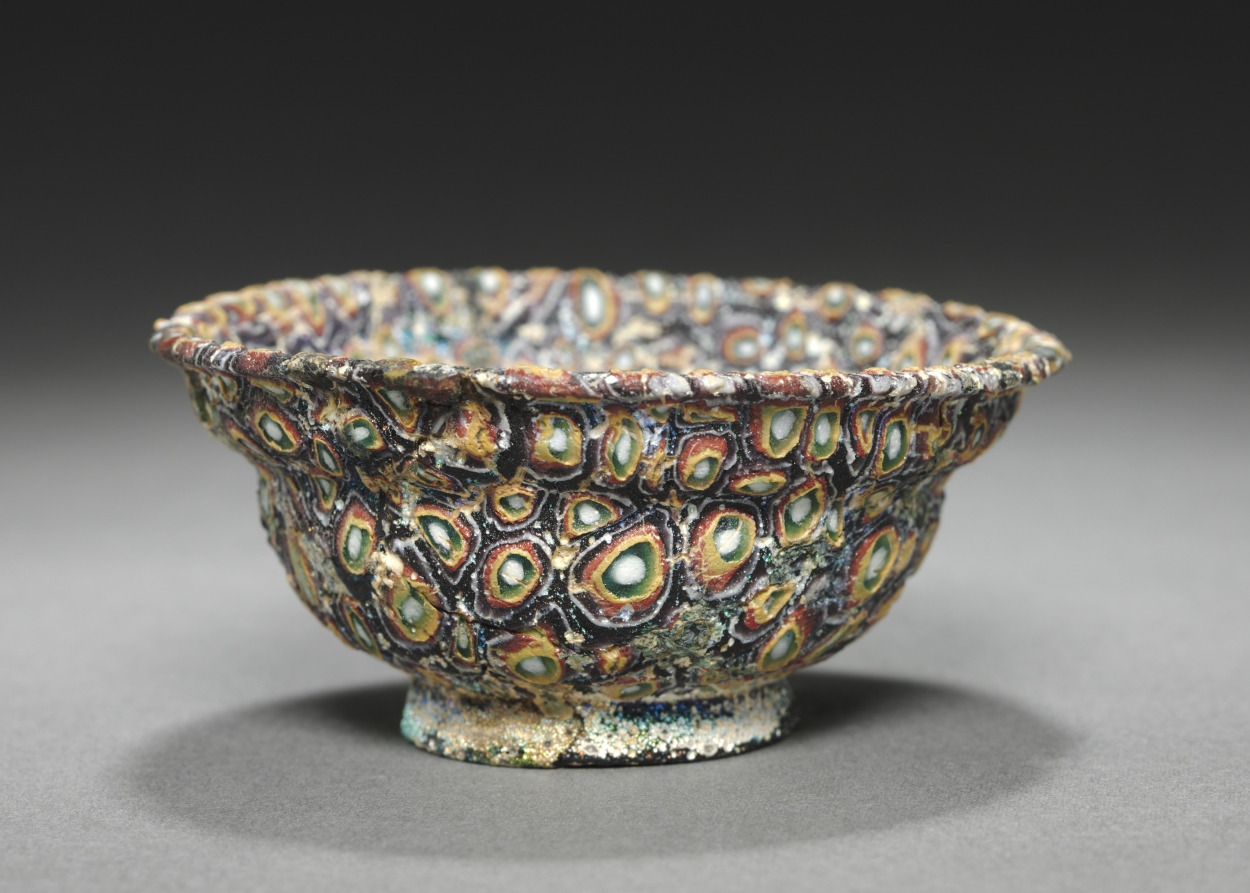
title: Millefiori Bowl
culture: Italy, Roman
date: 1–100 CE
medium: glass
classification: Glass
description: Mosaic glass, also called millefiori, was cast in a two-part mold. Fused glass rods of different colors were bundled together into patterns, then sliced into disk-shaped cross sections. These were placed within the mold and heated until fused. After cooling, the vessel’s surface was fire- or wheel-polished.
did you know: Millefiori, Italian for “thousand flowers,” describes the ancient glass-making technique later revived by Venetian artisans.